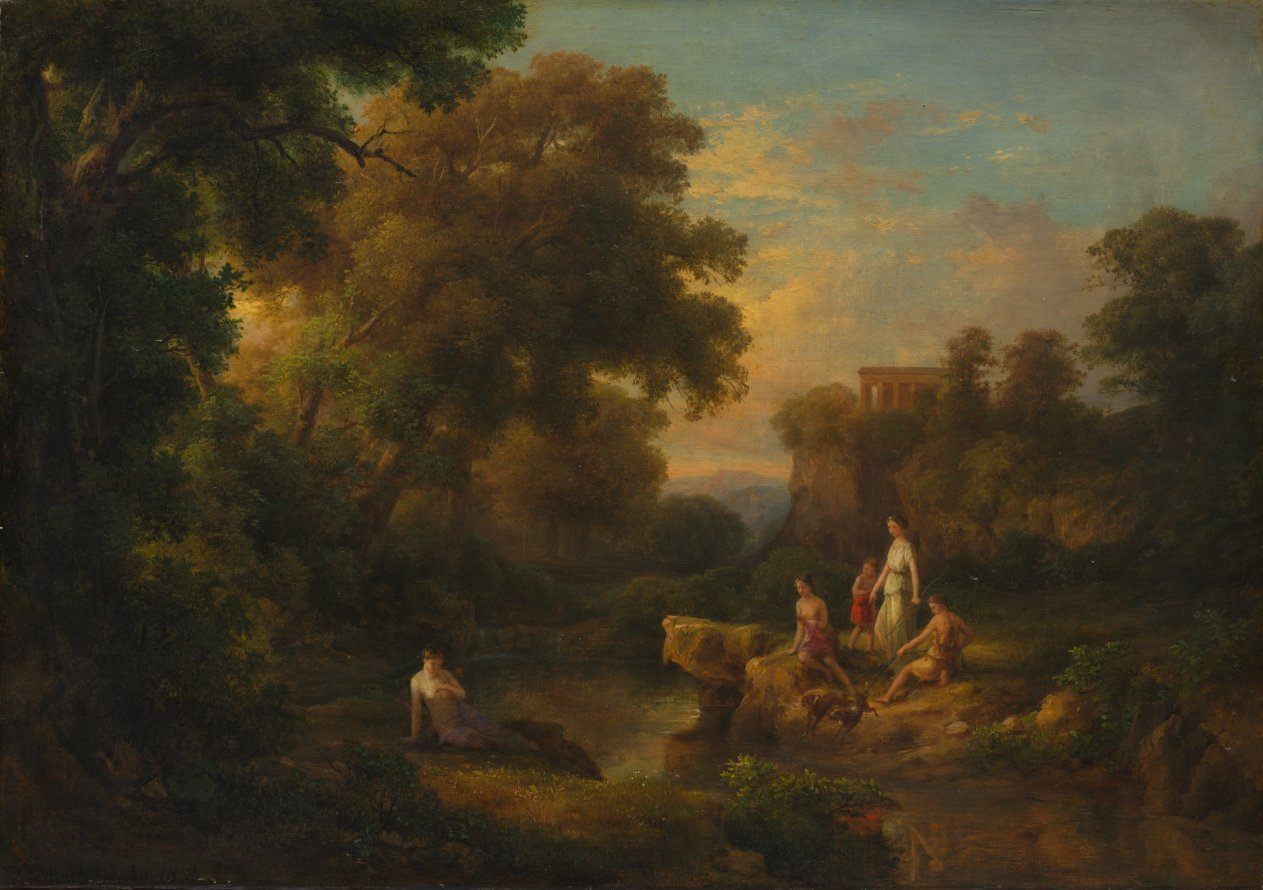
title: Diana and Her Nymphs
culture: Hungary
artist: Károly Markó (Hungarian, 1791–1860)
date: 1853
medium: oil on fabric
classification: Painting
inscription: Signed lower left: C. Markó p. Ap. 1853